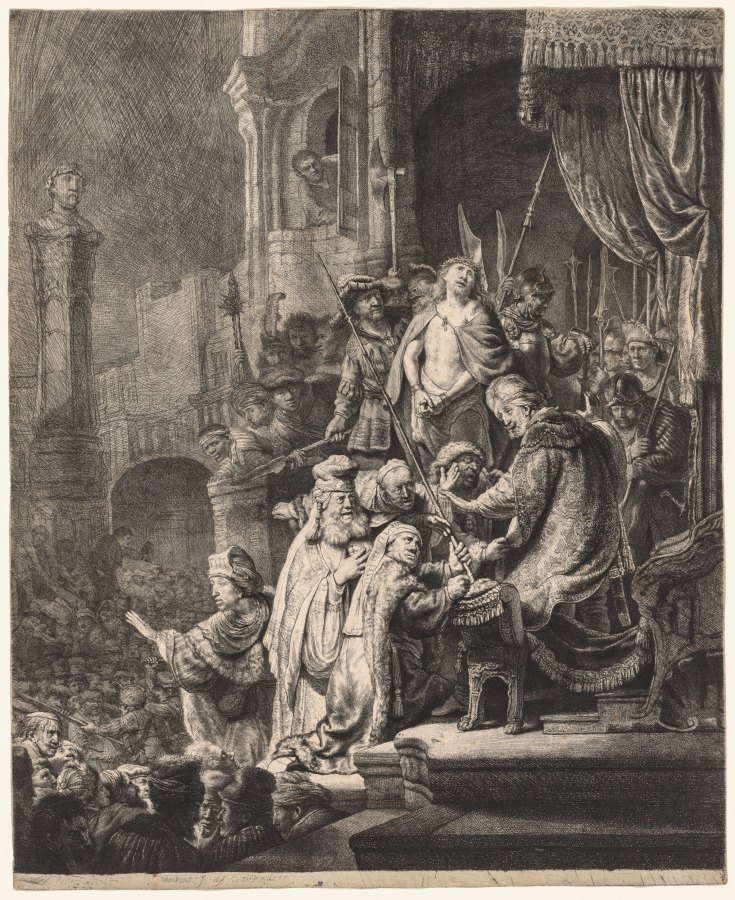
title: Christ Before Pilate: Large Plate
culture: Netherlands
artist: Rembrandt van Rijn (Dutch, 1606–1669)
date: 1636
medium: etching and engraving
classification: Print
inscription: lower left, in plate: Rembrandt f. 1636 cum privile. ; VERSO, lower left, in graphite: [illegible] ; lower left, in graphite: W. 82 ; lower left, in graphite: a13389[crossed out] a57512 ; lower left, in graphite: A.[Aon...ofofterne?]; lower left, in graphite: E[symbol for pi?]w/w/w ; lower right, in graphite: Duke of Buccleuch